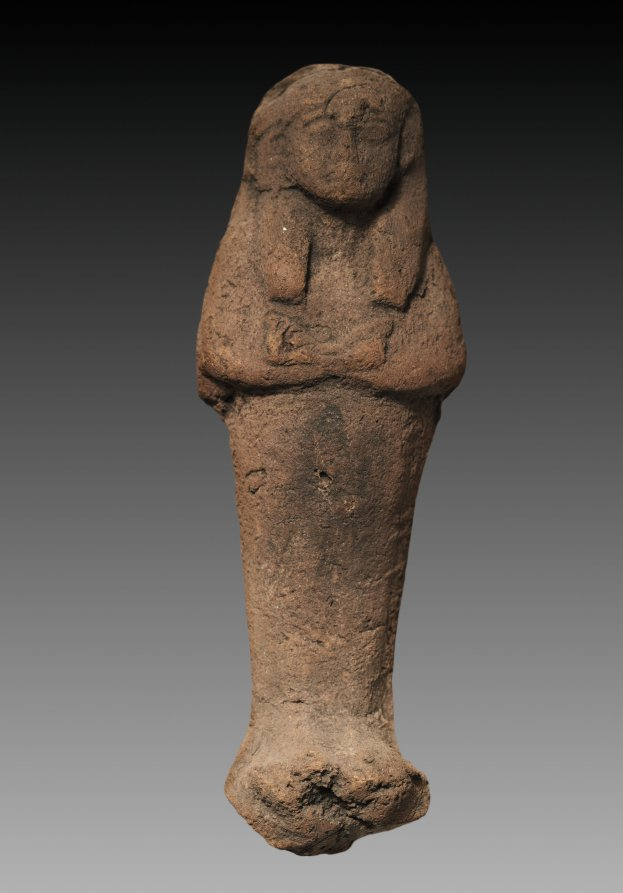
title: Shawabty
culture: Egypt, New Kingdom (1540–1069 BCE), Dynasty 19, reign of Ramesses II (1279–1213 BCE)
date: 1250–1213 BCE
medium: terracotta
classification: Funerary Equipment